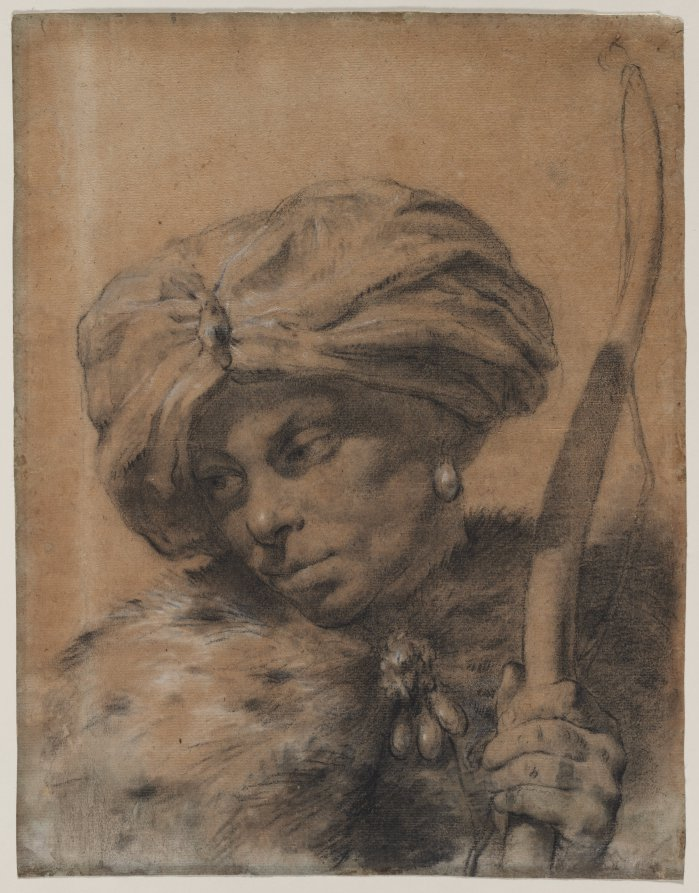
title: Archer with Turbaned Headdress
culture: Italy, Venice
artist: Giovanni Battista Piazzetta (Italian, 1682–1754)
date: c. 1740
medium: black chalk, stumped, with black chalk wash, heightened with white chalk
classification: Drawing